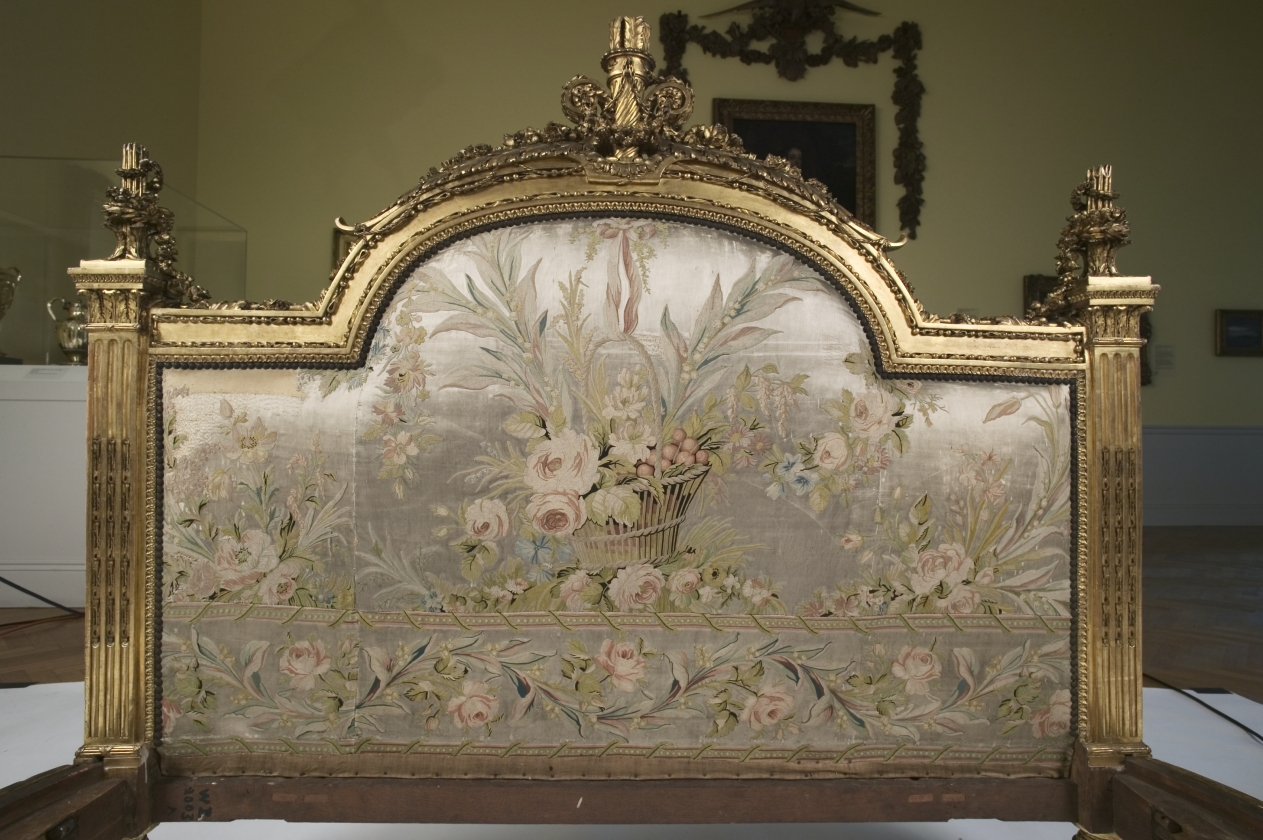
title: Bed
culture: France, 18th century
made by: attributed to Georges Jacob (French, 1739–1814)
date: 1700s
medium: gilded wood and embroidered satin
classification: Furniture and woodwork